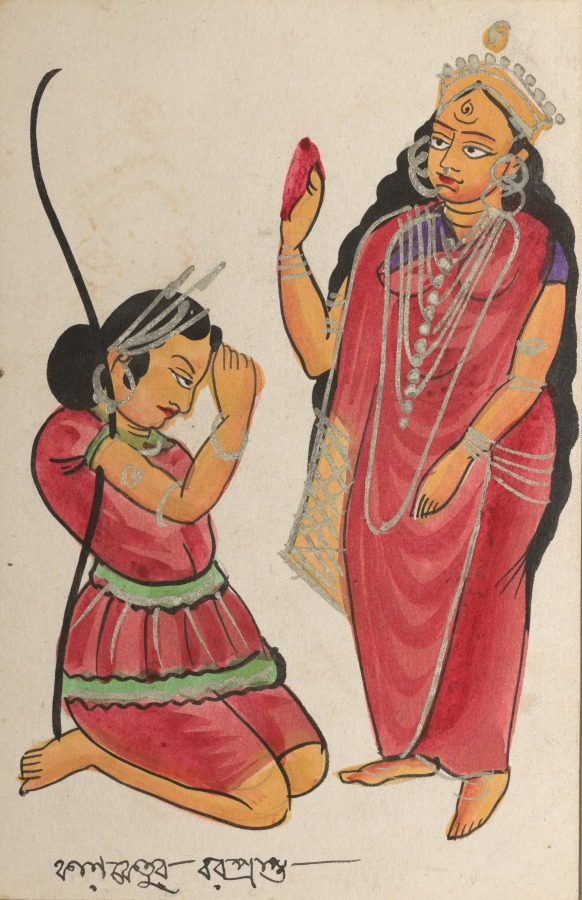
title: Kalaketu Receiving a Boon from the Goddess Chandi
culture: Eastern India, Bengal, Kolkata, Kalighat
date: c. 1890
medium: Gum tempera, graphite, ink, and tin on paper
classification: Painting